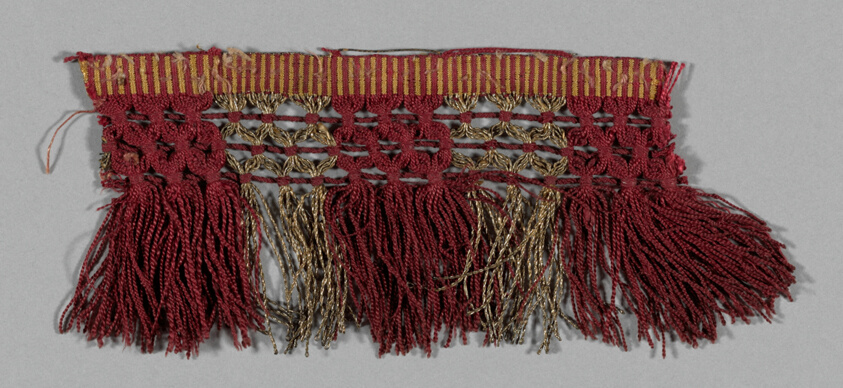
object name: Textile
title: Fringe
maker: Italy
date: 18th century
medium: silk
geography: Italy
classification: textile; weaving